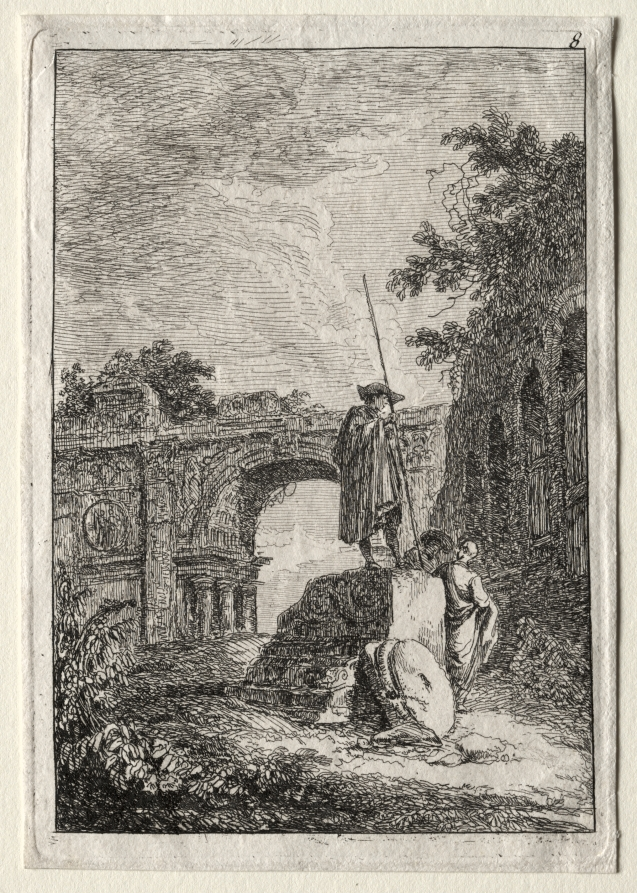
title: Les Soirées de Rome: L'Arc de triomphe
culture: France, 18th century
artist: Hubert Robert (French, 1733–1808)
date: 1763–64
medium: etching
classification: Print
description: Derived from his own pen-and-ink drawings, this suite of etchings features fictional characters situated near recognizable buildings and statues in Rome. On the title page, Robert dedicated the suite to Marguerite Le Compte, who visited Rome in 1764 in the company of the wealthy author and art enthusiast Claude Henri Watelet. Both Le Compte and Watelet were amateur etchers, and they socialized with a group that included artists and printmakers centered at the academies in Italy. Robert’s dedication was likely motivated by the hope of future patronage from Le Compte. She may be the generous woman with a hand muff depicted in The Ancient Temple, the fifth scene in this series.